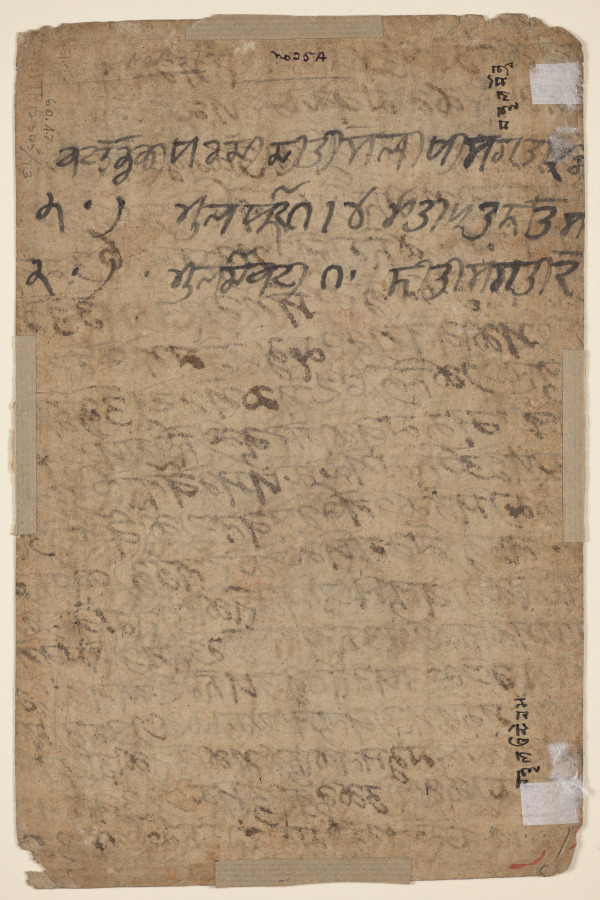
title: Posthumous portrait of Raja Chhatar Singh of Chamba smoking a hookah with his brother and son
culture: Northern India, Pahari kingdoms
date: c. 1700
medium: Gum tempera and ink on paper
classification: Painting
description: King Chhatar Singh (reigned 1664–90), his thinning facial hair shot through with gray, points to his heart, a gesture common in images of the deceased. With his right hand he grasps the pipe of a hookah, connecting him to his son Udai Singh, who holds the rim of its base. The king’s sword points directly to the boy, further linking them visually. Since hookah smoking connoted elite royal status in Pahari portraiture, this image suggests the passing of power from father to son.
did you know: The back of this painting is lined with reused ledger paper.